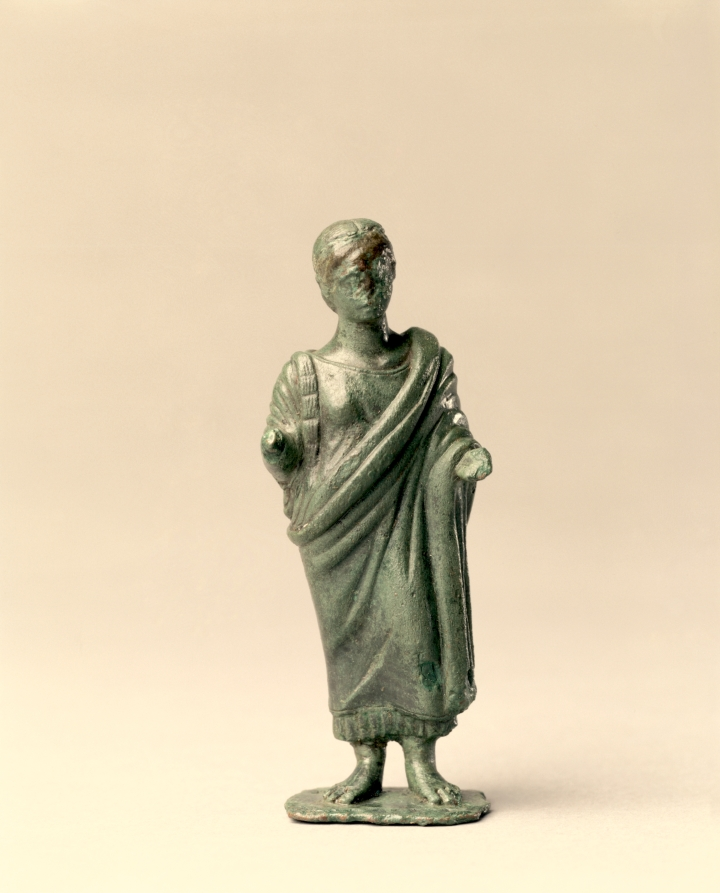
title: Female Statuette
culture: Italy, Etruscan, Archaic period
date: 600–480 BCE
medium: bronze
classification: Sculpture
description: Standing barefoot on a flat base, this woman wears a tunic with a decorated edge, a thick mantle draped over her left shoulder, and a headband. She extends both hands, though the left is damaged and the right missing. Her identity might have been made clear by the attributes she once held—a bird or pomegranate for Turan (the Etruscan analogue to Aphrodite), for example, or an offering dish or vessel for a worshipper.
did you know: The flat, integrated base of this statuette includes an attachment element below.